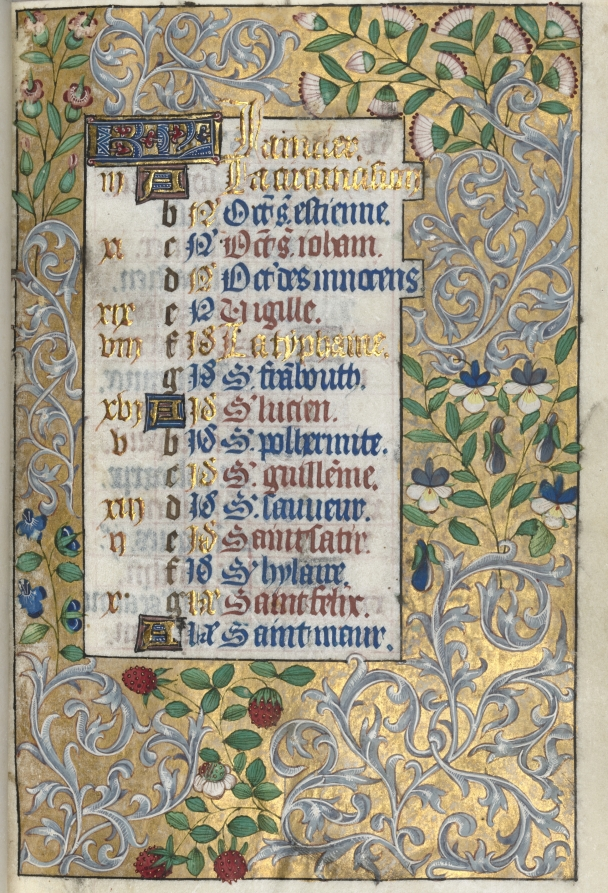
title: Book of Hours (Use of Rouen): fol. 1r, Calendar Page for January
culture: France, Rouen, 15th century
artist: Master of the Geneva Latini (French, active Rouen, 1460–80)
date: c. 1470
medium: ink, tempera, and gold on vellum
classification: Bound Volume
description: In the late 1400s and early 1500s Rouen was an established and important center of book production. The city’s cathedral had a wealthy chapter that spent large sums of money to commission books and to maintain its extensive library. The stationers and booksellers would have likely been concentrated in or near the cathedral precinct. This artist, named after a manuscript now in Geneva, was Rouen’s principal illuminator during the second half of the 1400s.